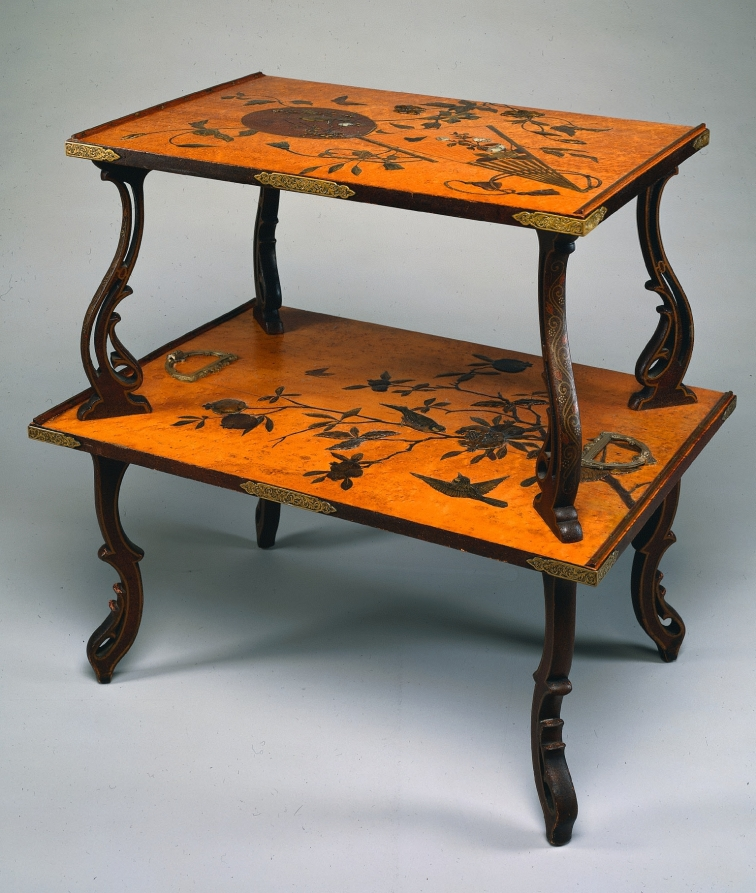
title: Table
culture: France, Nancy, 19th century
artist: firm of Louis Majorelle (French, 1859–1926)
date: c. 1885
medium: wood decorated with lacquer, inlays of mother-of-pearl and bronze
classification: Furniture and woodwork